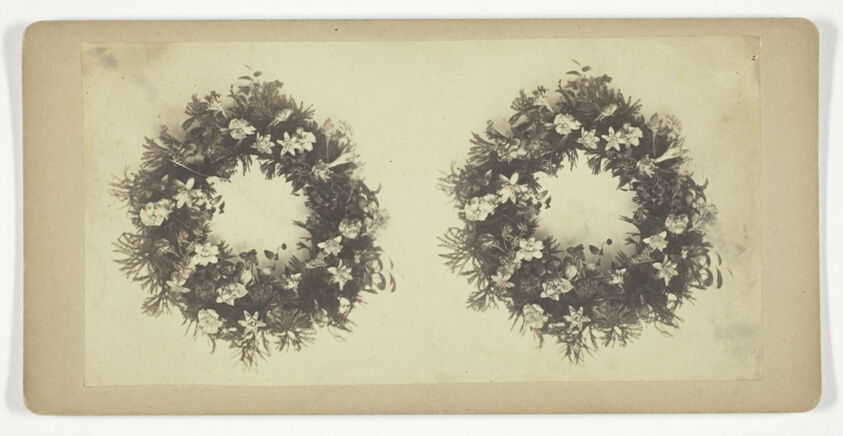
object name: Photograph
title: Untitled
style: 19th century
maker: W.W. Culver (American, active mid 19th century)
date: Mid 19th century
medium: Albumen print, stereo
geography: Lebanon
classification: photography; photograph; albumen silver print; stereograph (albumen)